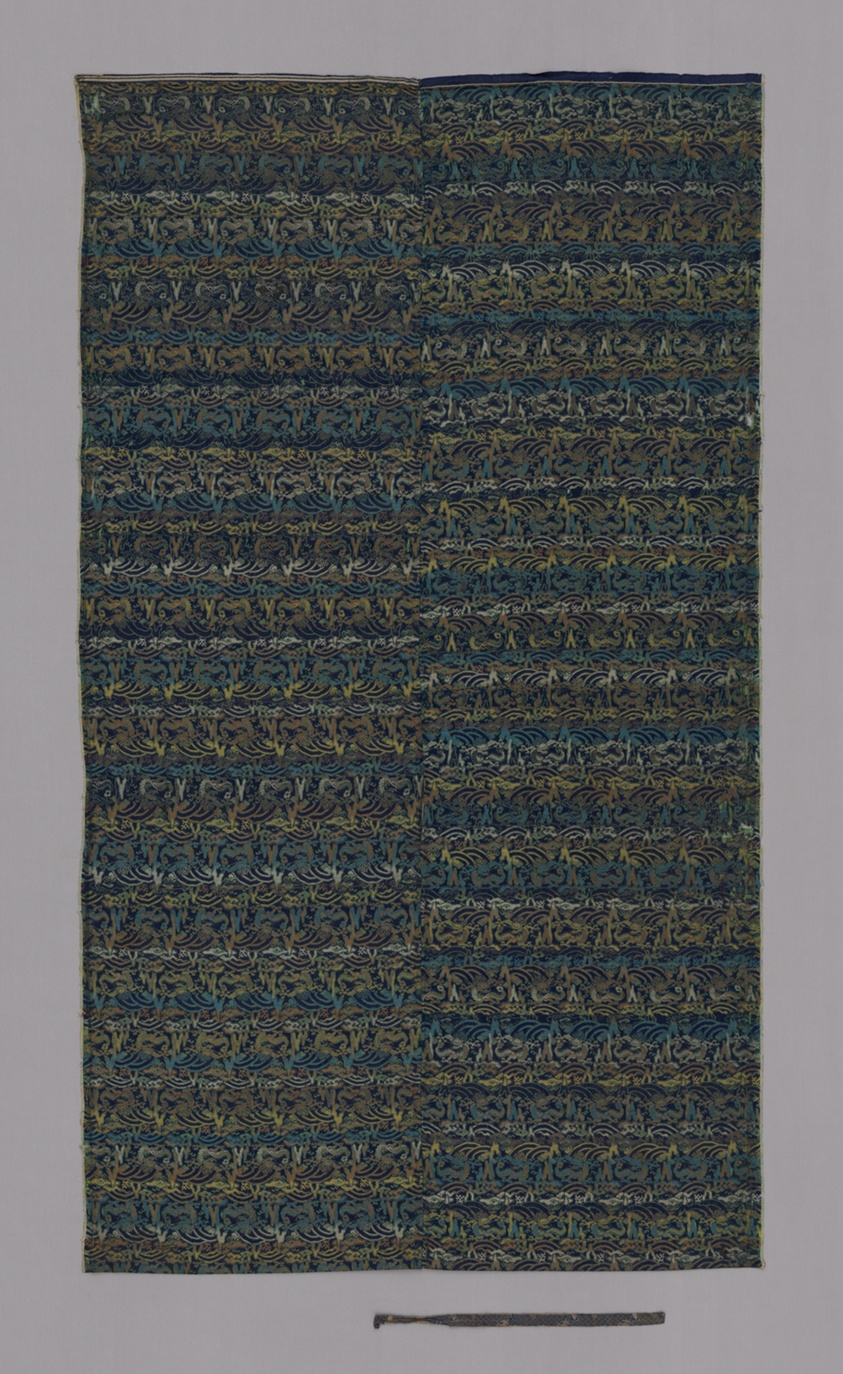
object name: Textile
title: Fragment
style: qing, Chinese (culture or style), East Asian, asian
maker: China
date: Qing dynasty(1644–1911), early 19th century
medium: Fancy compound satin, silk and gilt paper; wound on white silk core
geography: China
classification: textile; weaving